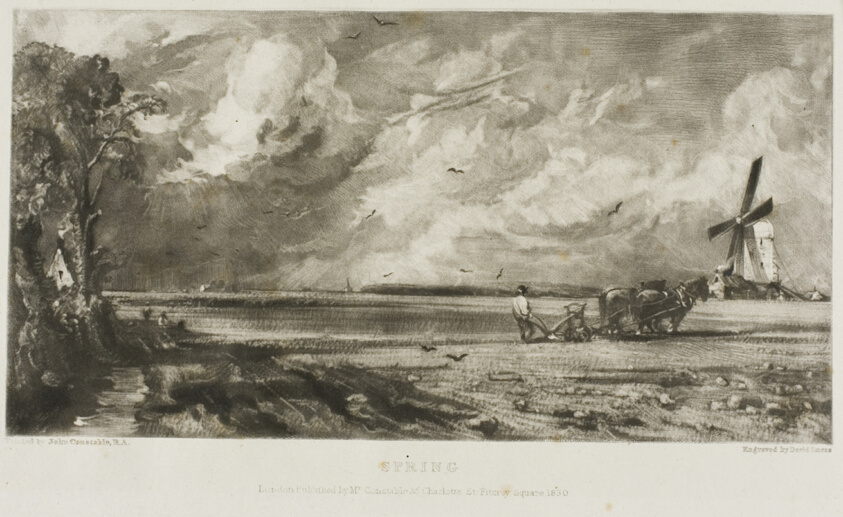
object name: Print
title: Spring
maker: David Lucas (English, 1802-1881); after John Constable (English, 1776-1837)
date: 1830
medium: Mezzotint on paper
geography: England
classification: mezzotint; print; prints and drawing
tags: landscapes